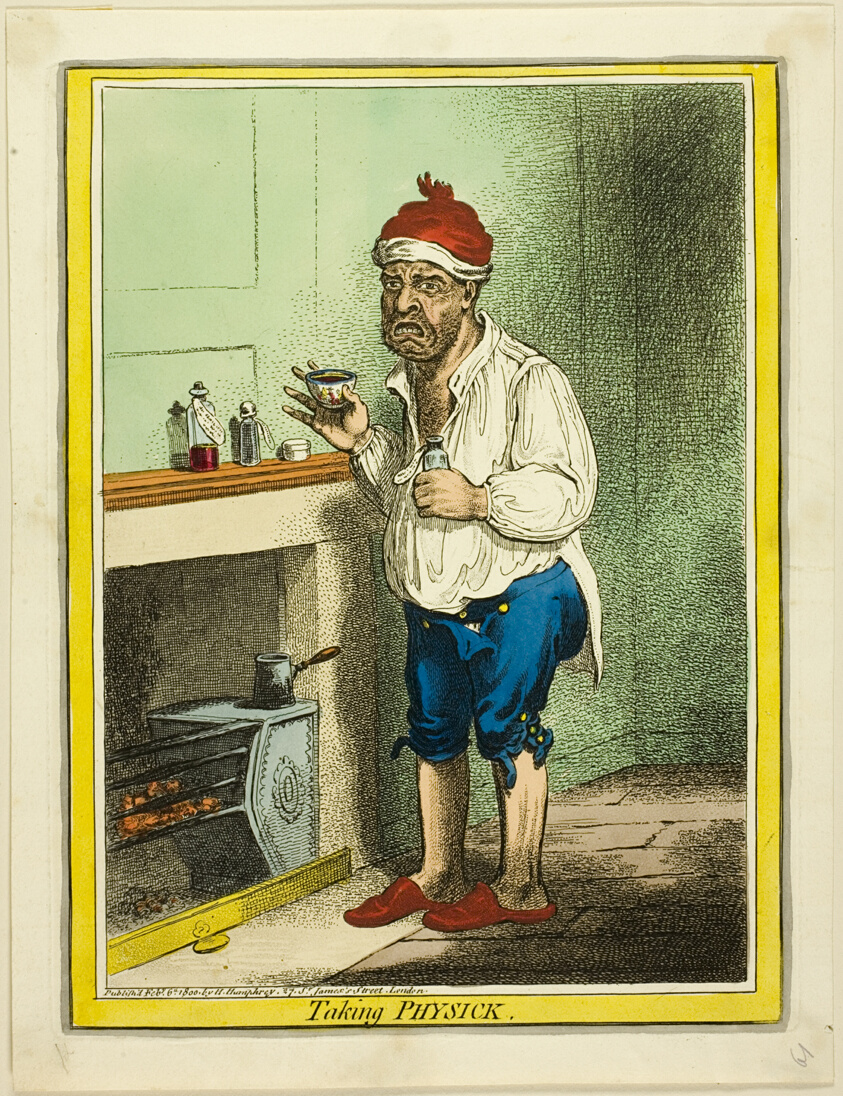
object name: Print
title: Taking Physick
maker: James Gillray (English, 1756-1815); published by Hannah Humphrey (English, c. 1745-1818)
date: published February 6, 1800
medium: Hand-colored etching on paper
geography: England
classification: etching; print; prints and drawing